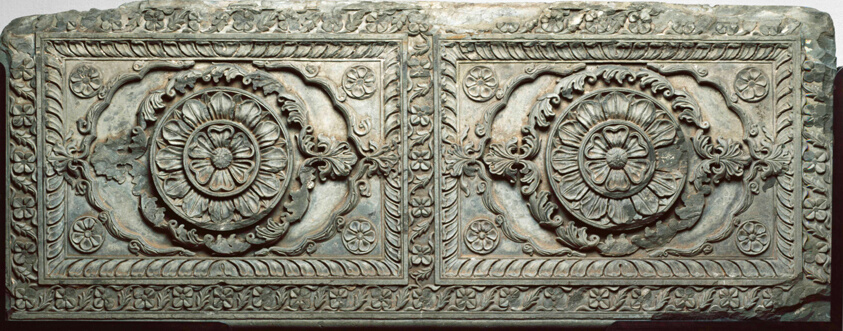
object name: Architectural fragment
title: Architectural relief panel with floral design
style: South Asian, mughal, Indian (South Asian), asian, Islamic (culture or style)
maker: India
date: 18th century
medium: Slate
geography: India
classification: stone; architectural fragment; asian art